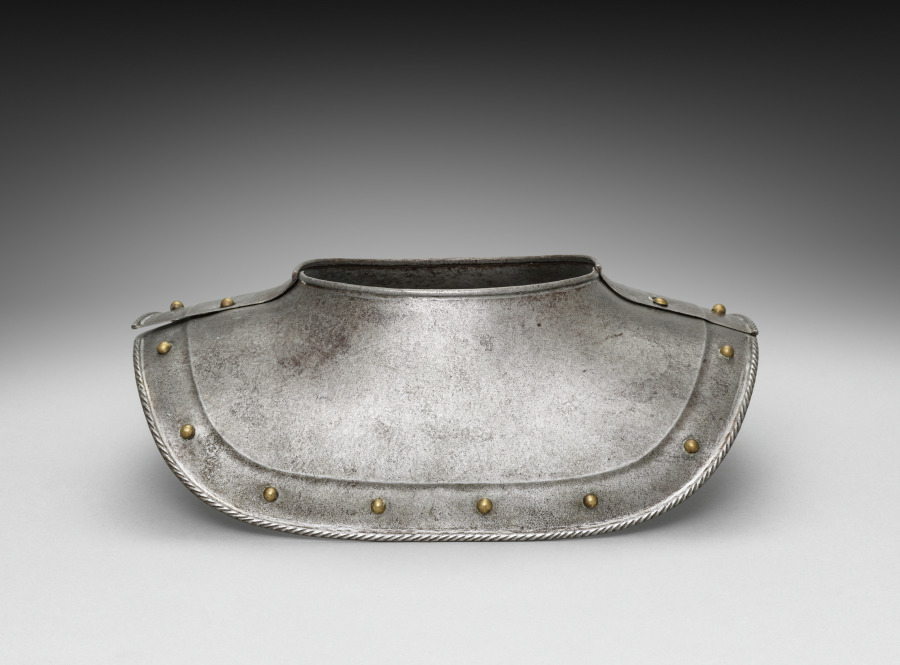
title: Colletin (two pieces)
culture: Germany, 19th century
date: 1801–1900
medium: steel with black paint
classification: Arms and Armor